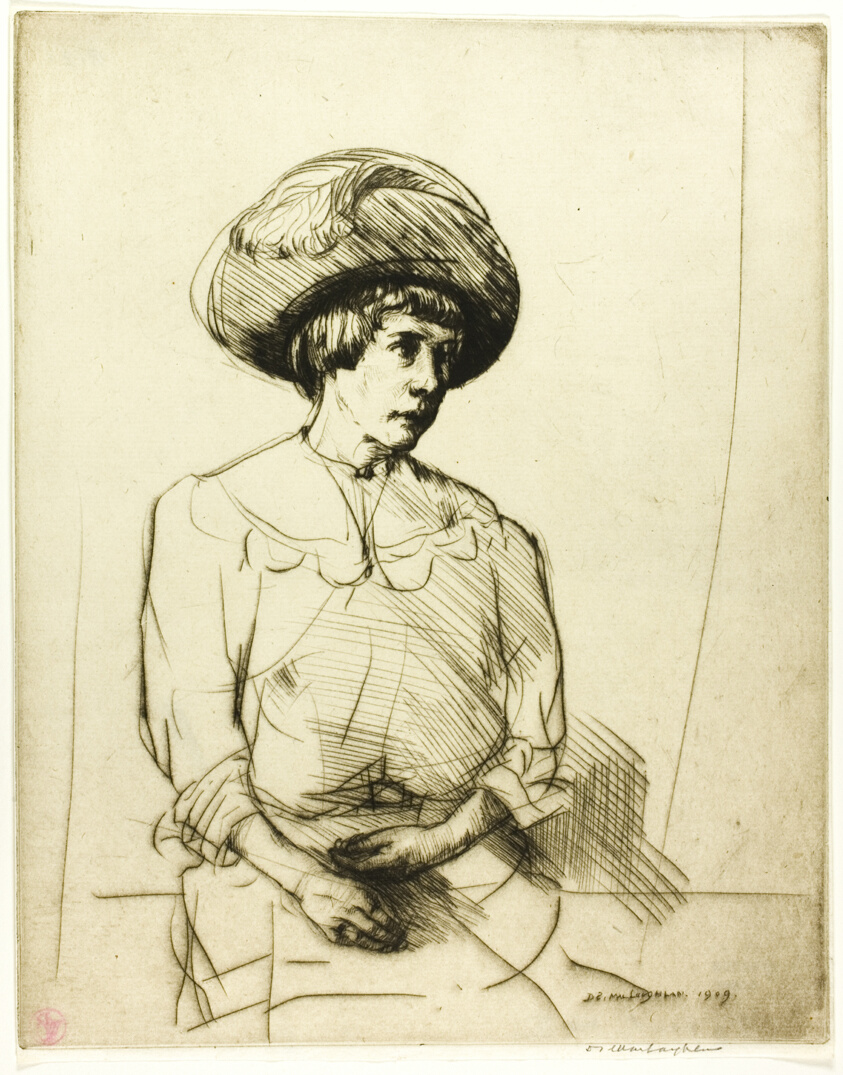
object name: Print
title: Drypoint Number Two: Portrait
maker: Donald Shaw MacLaughlan (American, born Canada, 1876-1938)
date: 1909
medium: Drypoint in black on cream laid paper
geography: United States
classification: drypoint; print; prints and drawing